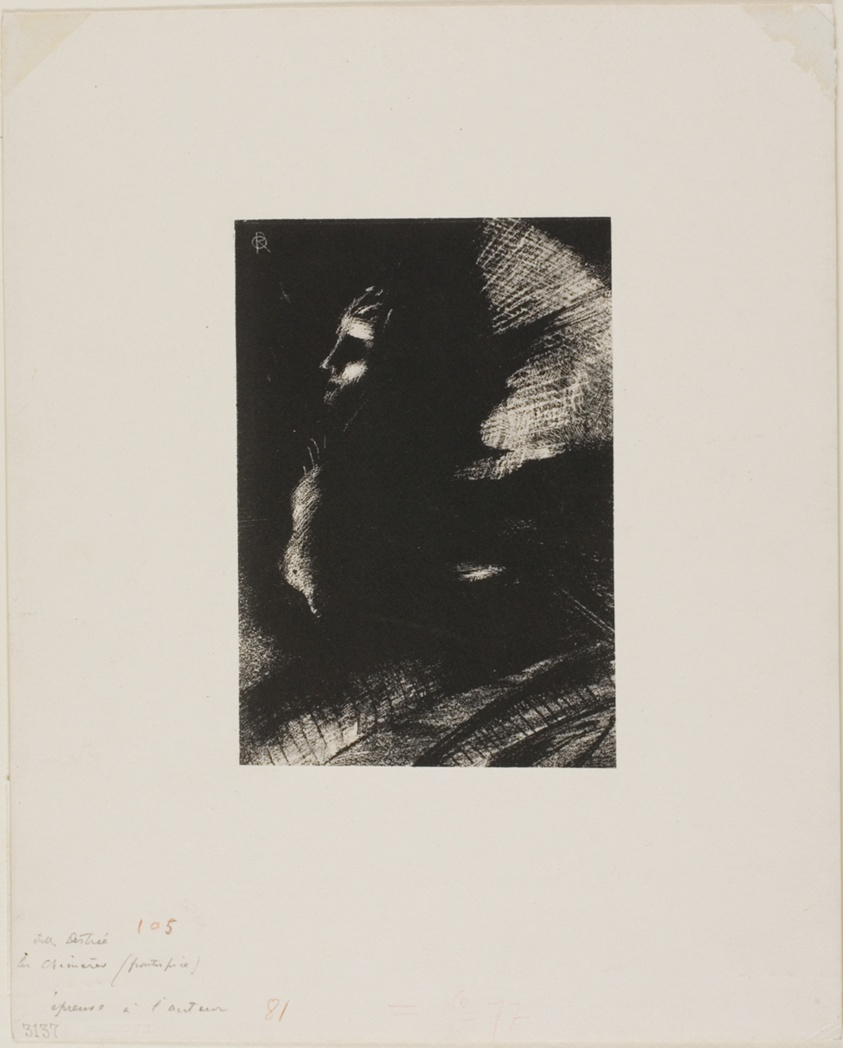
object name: Print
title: Frontispiece for Les Chimères by Jules Destrée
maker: Odilon Redon (French, 1840-1916)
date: 1889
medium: Lithograph in black on ivory China paper laid down on ivory wove paper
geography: France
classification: lithograph; print; prints and drawing; paper